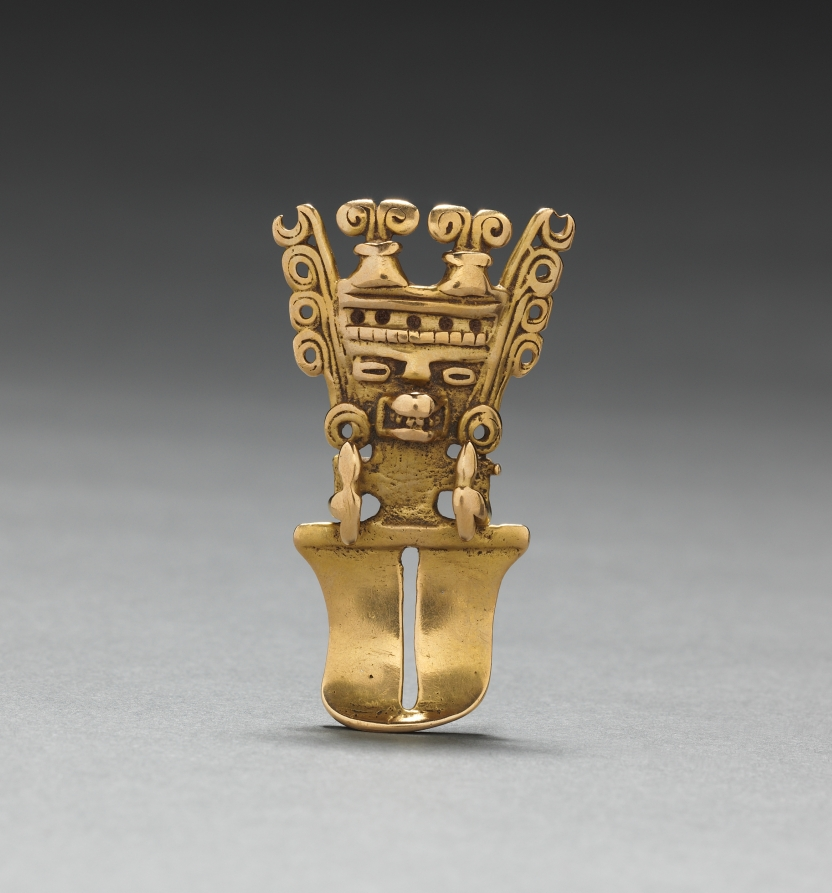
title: Figurine Pendant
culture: Colombia, Quimbaya or Yotoco style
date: c. 400–1000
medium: cast gold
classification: Metalwork